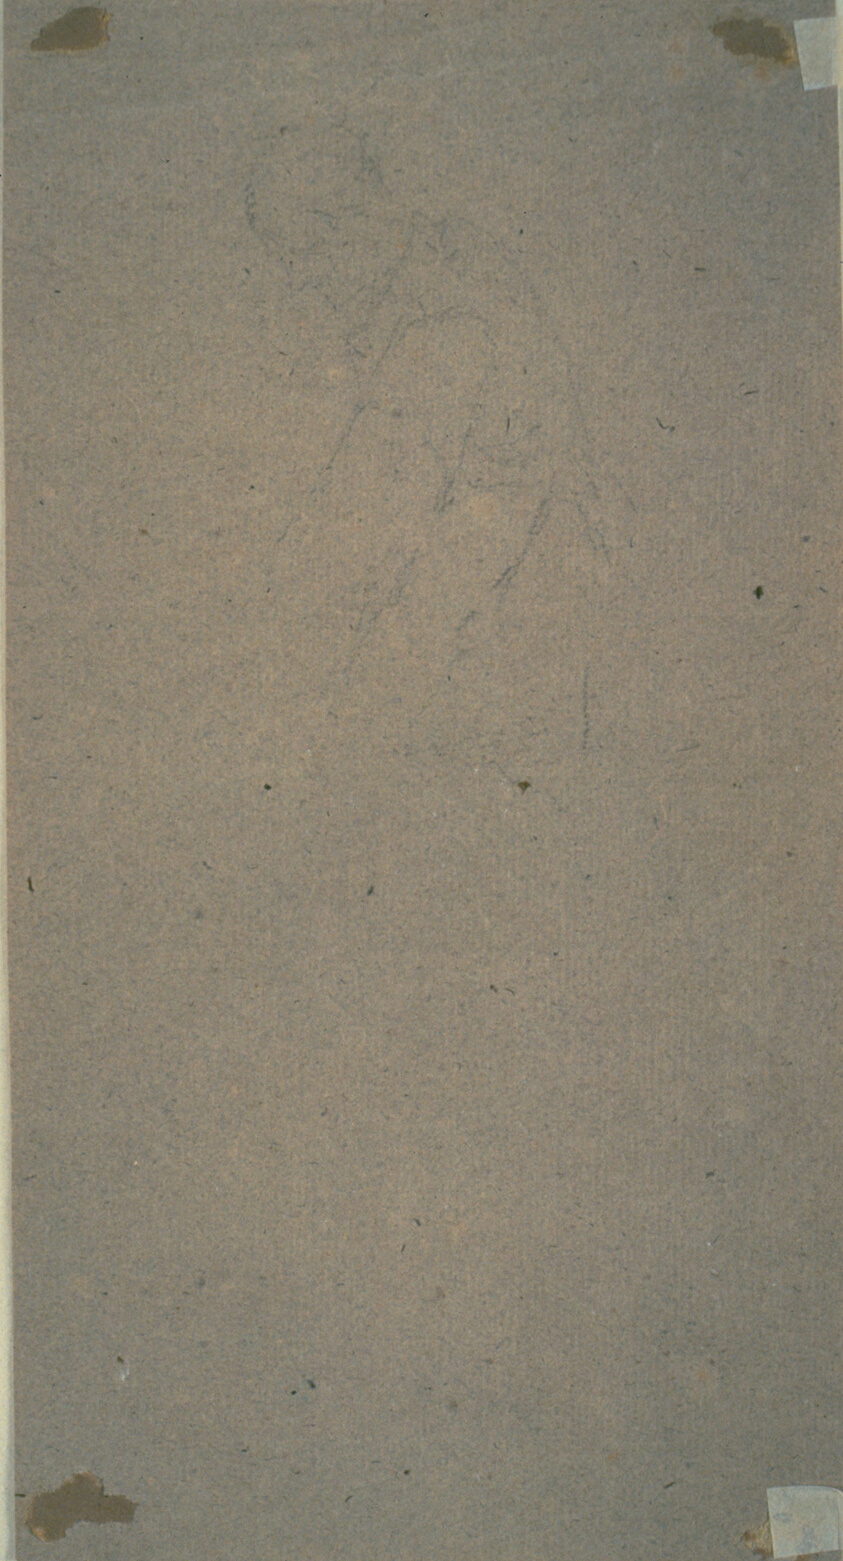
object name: Drawing and Watercolor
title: Sketch of Clothed Torso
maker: Nicolas Lancret (French, 1690-1743)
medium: Black chalk on brownish-gray laid paper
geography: France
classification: drawings (visual works); prints and drawing